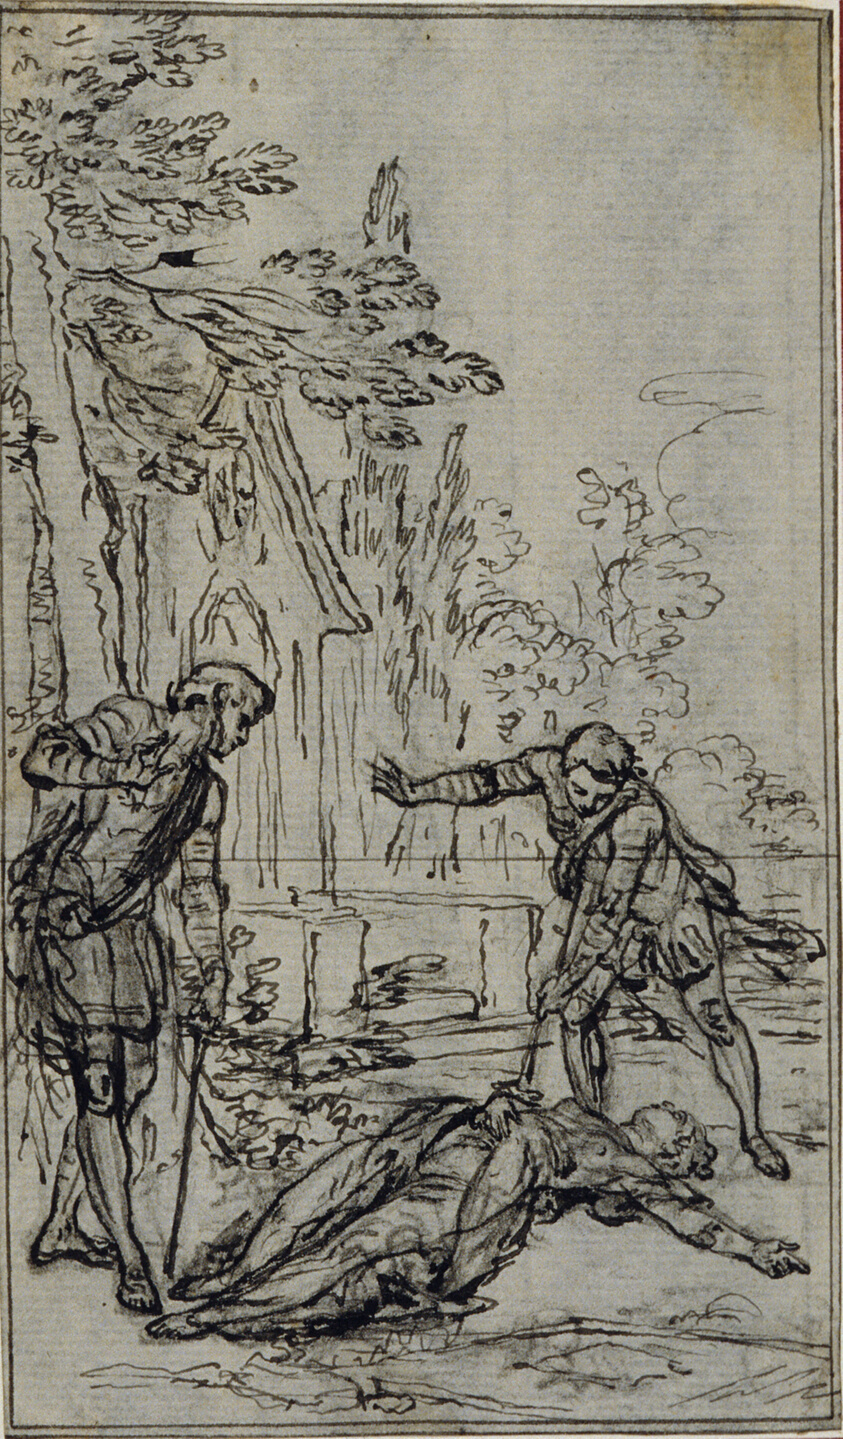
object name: Drawing and Watercolor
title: Study for Vignette in Voltaire's "La Pucelle d'Orleans"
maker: Hubert François Gravelot (French, 1699-1773)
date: c. 1762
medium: Pen and black ink over black chalk, on gray laid paper, laid down on ivory laid paper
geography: France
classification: pen and ink drawings; drawings (visual works); prints and drawing